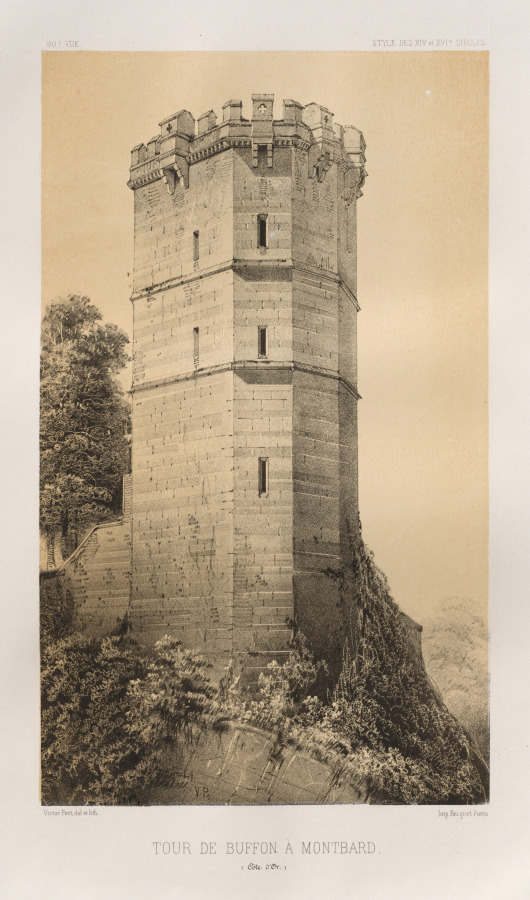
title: Architecture Pittoresque ou Monuments des XVeme. Et XVIeme. Siecles: Chateaux de France des XV et XVI Siecles: Pl. 90, Tour de Buffon à Montbard (Côte d'Or)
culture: France, 19th century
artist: Victor Petit (French, 1817–1874)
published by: Charles Boivin (publisher and editor); Lith de Godard a Paris (printer)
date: 1860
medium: lithograph with tint stone, from portfolio of 100 lithographs with tint stone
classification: Print